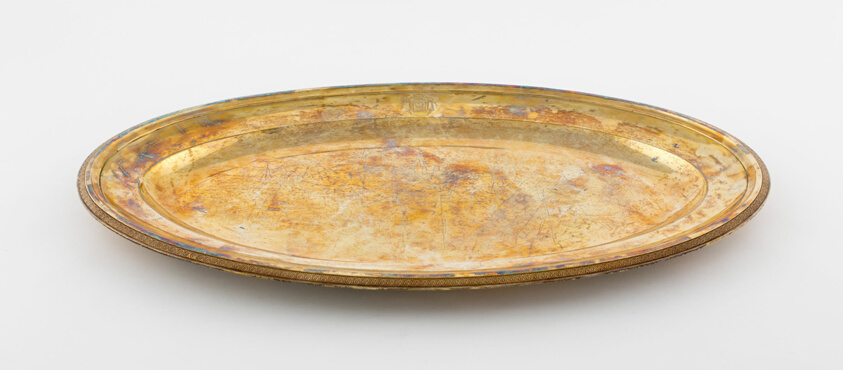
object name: Metalwork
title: Pair of Platters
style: napoleonic, empire, Neoclassicism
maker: Martin-Guillaume Biennais (French, 1764-1843); Paris, France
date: c. 1794-1819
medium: Gilt silver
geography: Paris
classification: dish (vessel); silver; vessel for serving food; metalwork; european decorative arts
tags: Borghese Service, dining, Napoleon